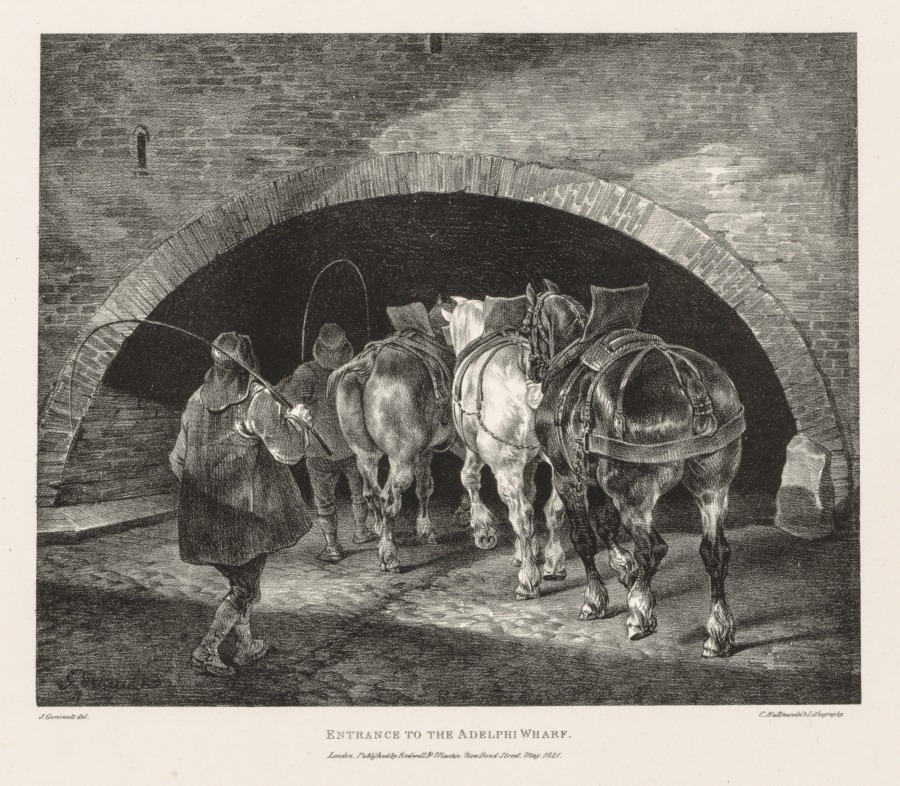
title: Various Subjects Drawn from Life and on Stone: Entrance to Adelphi Wharf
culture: France, 19th century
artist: Théodore Géricault (French, 1791–1824)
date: 1821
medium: lithograph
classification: Print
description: Gericault produced a wonderful set of lithographs on a visit to London in 1820–21. Entrance to Adelphi Wharf exploits the inherent ability of lithography to produce opaque blacks and an unlimited range of grays.